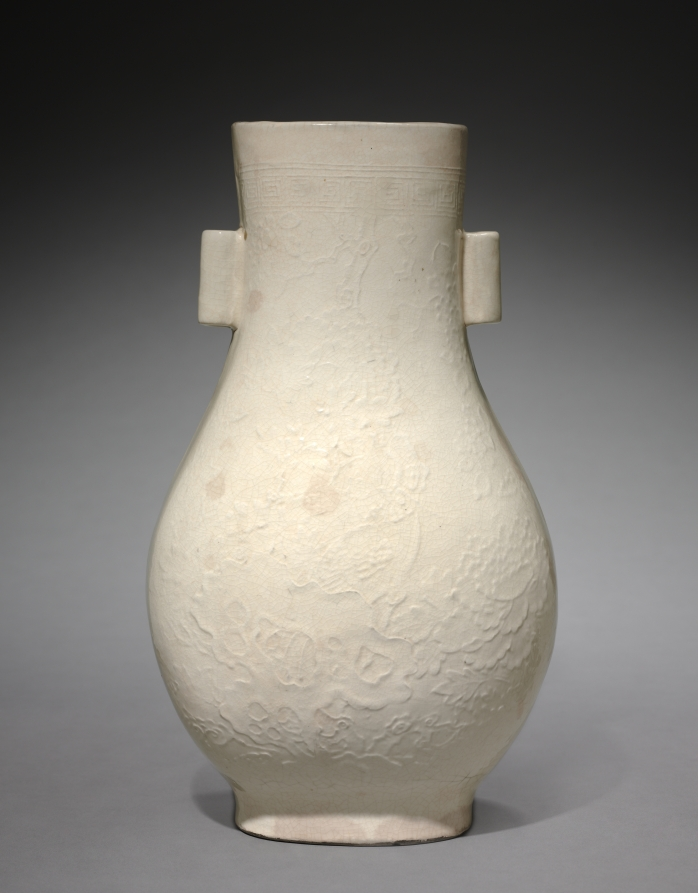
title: Vase: Ding ware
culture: China, Ming dynasty (1368–1644)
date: 1368–1644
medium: porcelain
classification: Ceramic